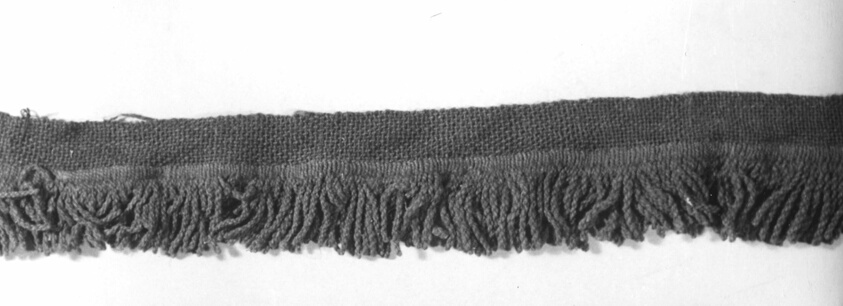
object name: Textile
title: Band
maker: Peru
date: 100 B.C./1532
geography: Peru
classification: textile; weaving